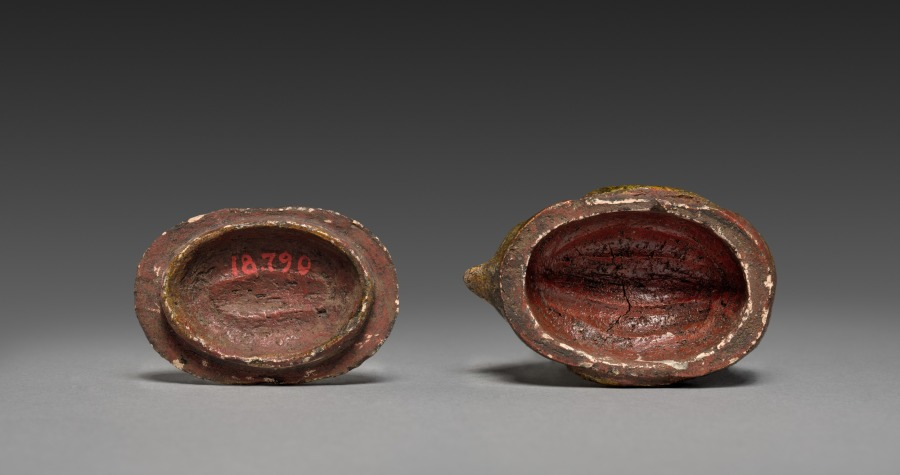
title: Incense Container (Kōgō) in the Shape of a Bird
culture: Japan, Edo period (1615–1868)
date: c. 1700–1868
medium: Stoneware with glaze and carved decoration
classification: Ceramic